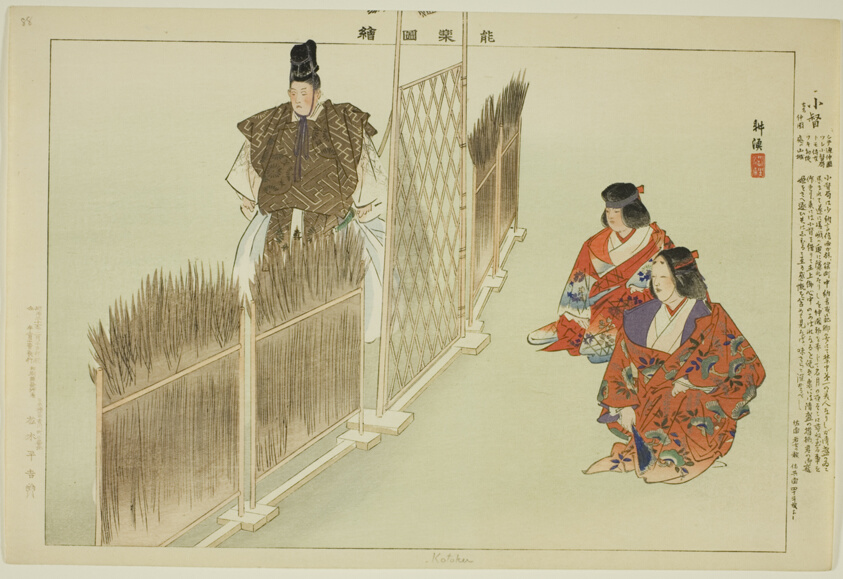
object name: Print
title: Kotoku, from the series "Pictures of No Performances (Nogaku Zue)"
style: Japanese (culture or style)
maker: Tsukioka Kogyo; Japanese, 1869-1927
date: 1898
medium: Color woodblock print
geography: Japan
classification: woodblock print; print; asian art